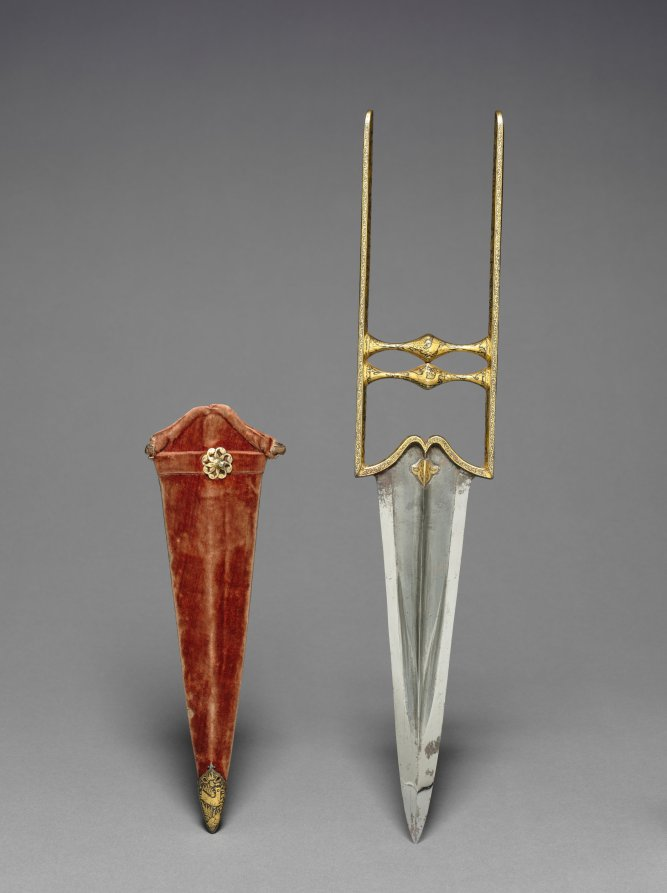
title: Katar dagger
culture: India, Mughal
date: 1700s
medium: Iron handle with gold inlay; steel blade; wooden sheath with velvet cover, brass boss, iron tip with gold inlay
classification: Arms and Armor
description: Stabbing daggers called katar were distinctive to India and often worn by soldiers and courtiers, tucked into their belts. Covering the entire handle are tiny scenes of lions and cheetahs hunting deer and buffalo in rocky wooded settings.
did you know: The ornament on the handle faces up from the perspective of a right-handed user, on all sides.